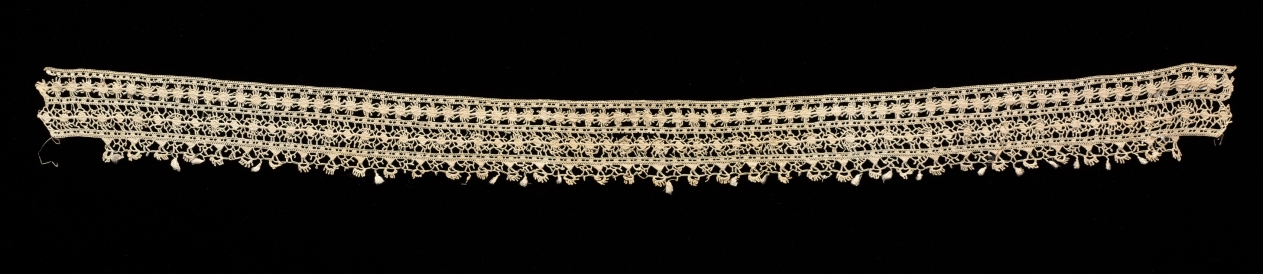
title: Lace Cuff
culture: Italy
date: 1600s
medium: Knotted lace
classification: Lace